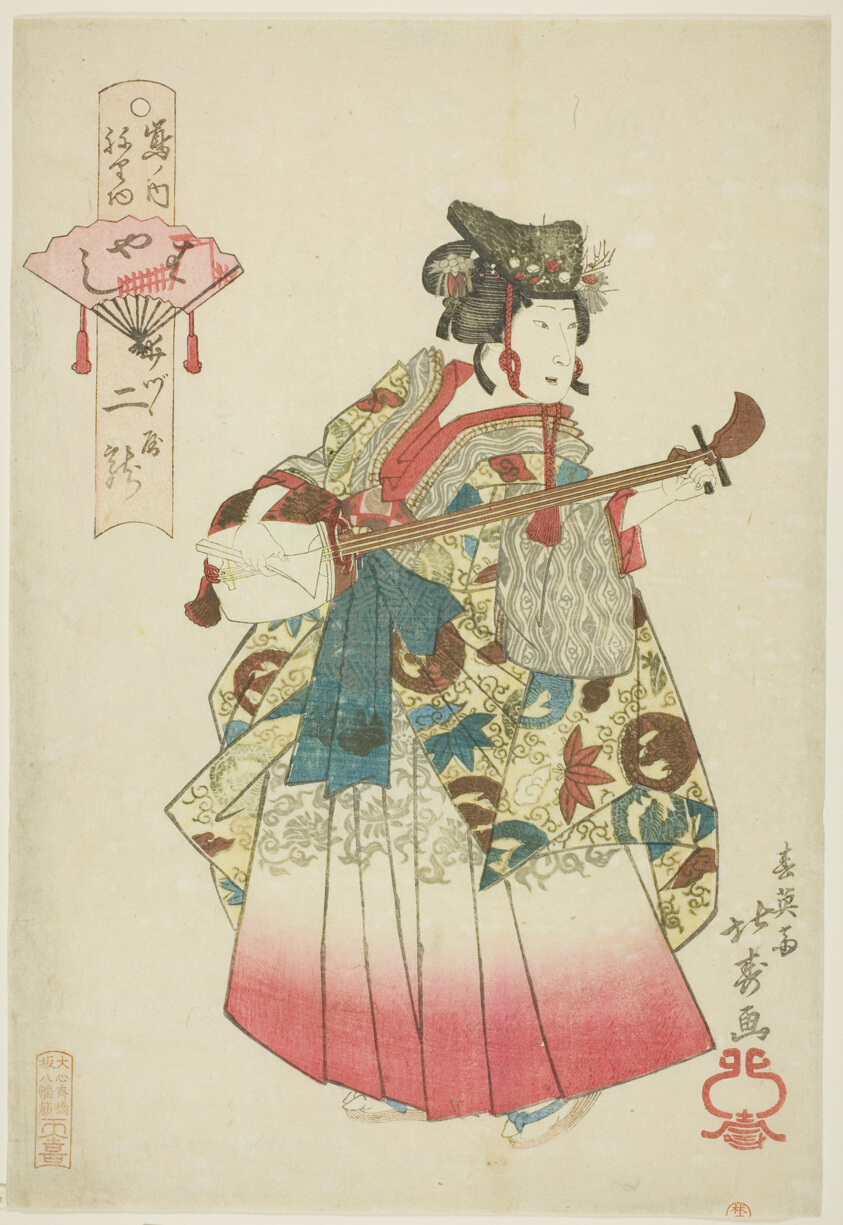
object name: Print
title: Futatsuryu of Izutsuya as a Musician (Hayashi), from the series "Parade of the Shimanouchi Pleasure Quarter (Shimanouchi nerimono)"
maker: Shunshosai Hokuju (Japanese, active about 1828–1836)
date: 1836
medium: Color woodblock print; oban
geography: Japan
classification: print; asian art